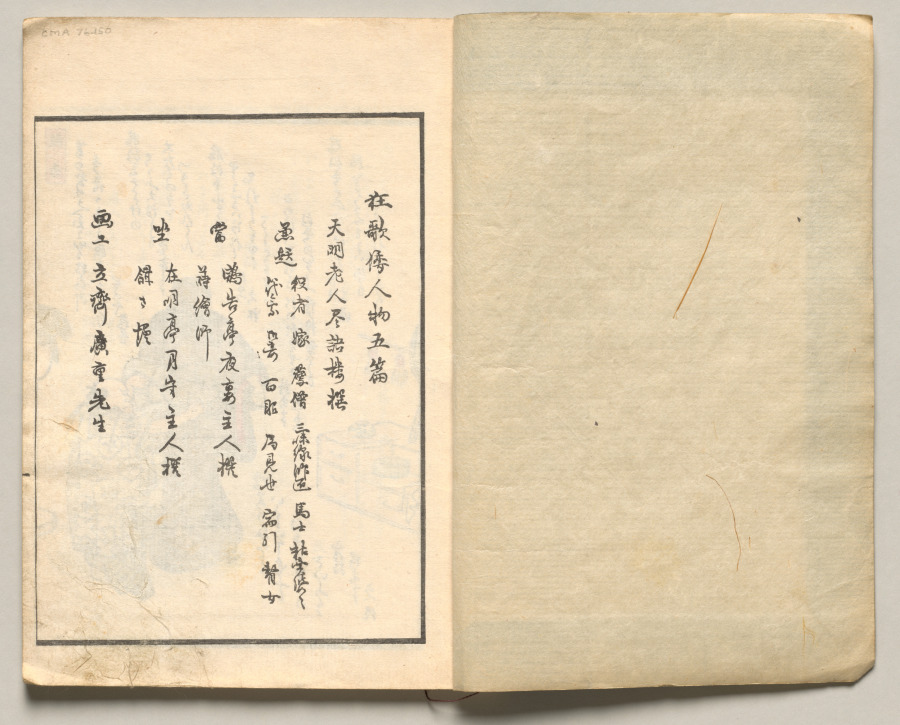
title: Spread One from Volume Five of People of Japan in Light Verse (Kyōka)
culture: Japan, Edo period (1615–1868)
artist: Utagawa Hiroshige (Japanese, 1797–1858)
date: 1857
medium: Woodblock-printed book; ink and color on paper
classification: Bound Volume